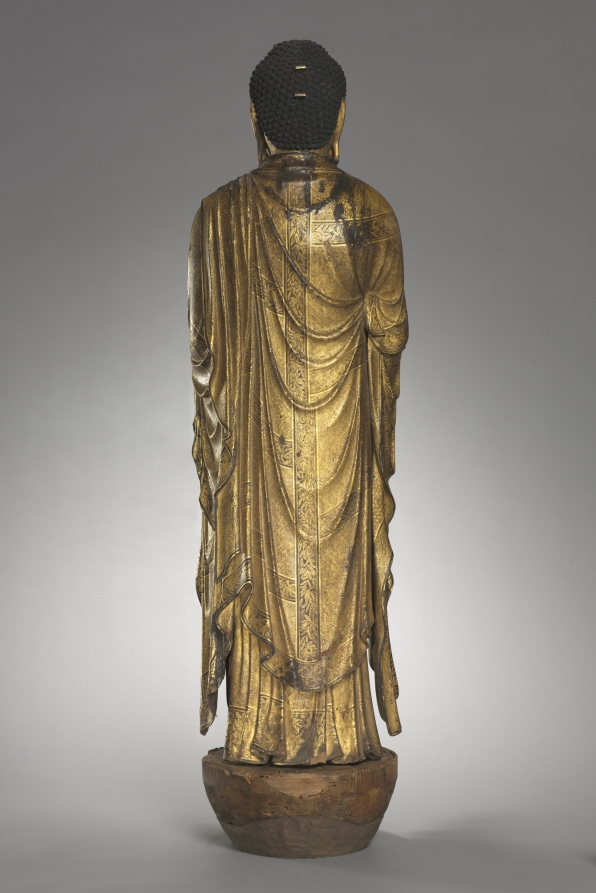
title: Buddha of Infinite Life and Light (Amida Nyorai)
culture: Japan, Kamakura period (1185–1333)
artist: Kōshun (Japanese, active mid-1200s)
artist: assisted by Koshin (Japanese, active mid-1200s)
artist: assisted by Joshun (Japanese, active mid-1200s)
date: 1269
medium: Cypress with lacquer, color, gold, cut gold, rock-crystal inlaid eyes, and quartz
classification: Sculpture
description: This ornate Buddha Amida stands in a posture of welcome, greeting the dying who will accompany him back to his Pure Land. Documents inserted into the sculpture’s hollow core around the time of its creation include a copy of the sacred text Amida Sutra, a register of donors who desired to be joined together in generating karmic merit (kechien) through the creation and dedication of the sculpture, and a record asserting that the image was completed over the course of 33 days in 1269 at Shitennōji Temple in Osaka.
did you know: The lead sculptor was Kōshun, who had been granted the lofty title “Bridge of the Law.”